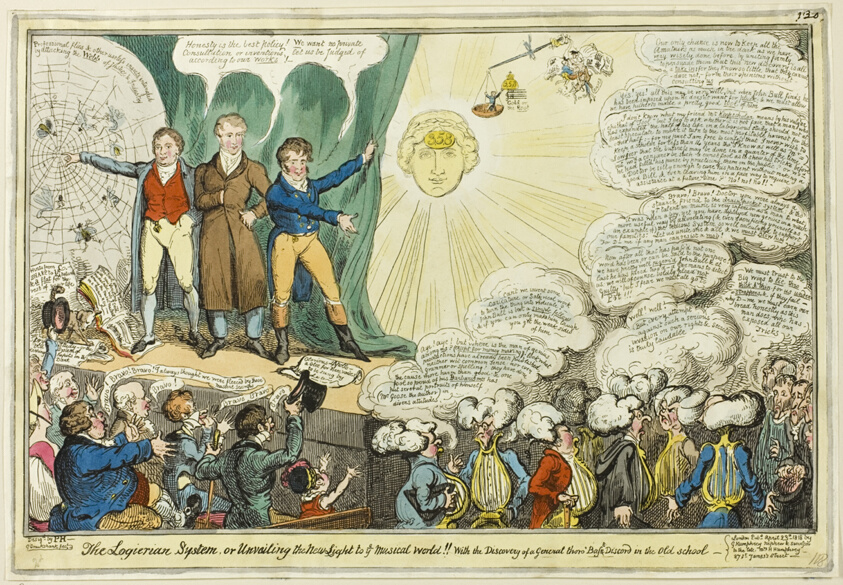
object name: Print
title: The Logierian System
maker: George Cruikshank (English, 1792-1878); published by George Humphrey (English, c. 1773-1831)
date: published April 23, 1818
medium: Hand-colored etching on paper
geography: England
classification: etching; print; prints and drawing